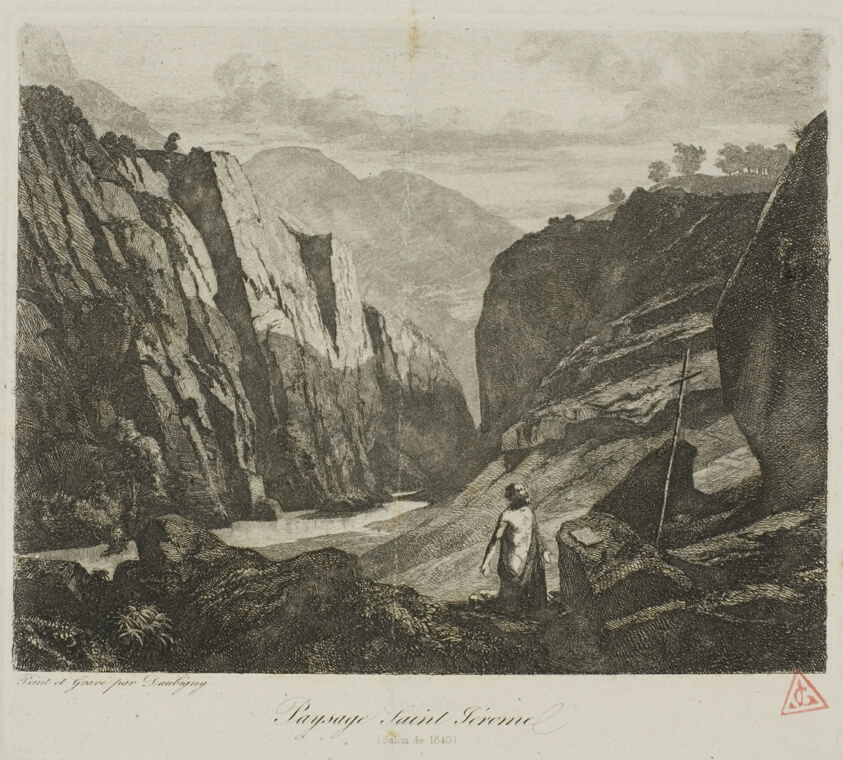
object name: Print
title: Saint Jerome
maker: Charles François Daubigny (French, 1817-1878)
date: 1840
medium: Etching on ivory wove paper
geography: France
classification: etching; print; prints and drawing